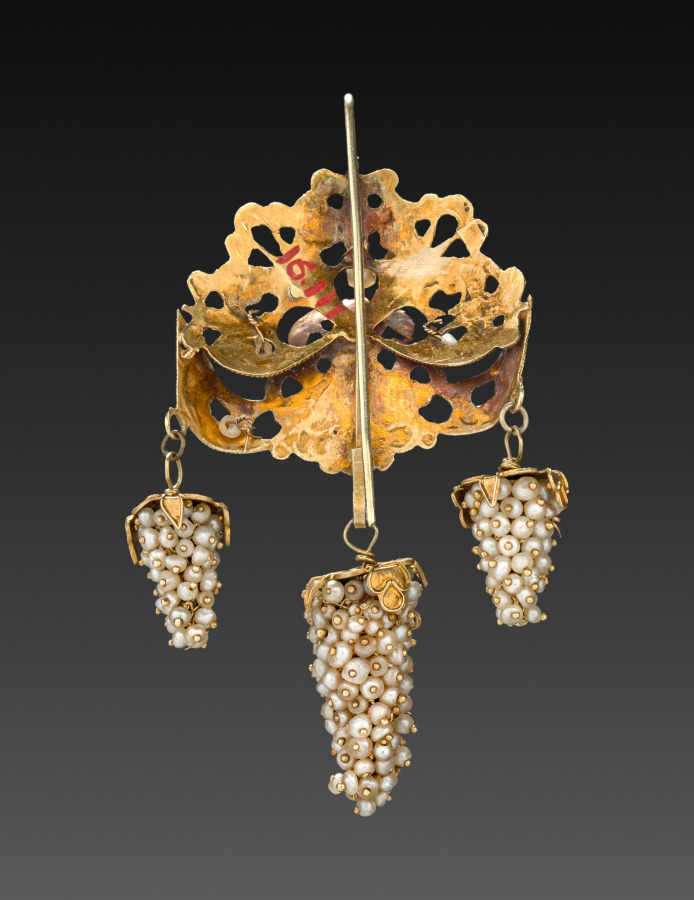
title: Earring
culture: Italy, Naples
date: 1700s–1800s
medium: gold and enamel with pearls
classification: Jewelry